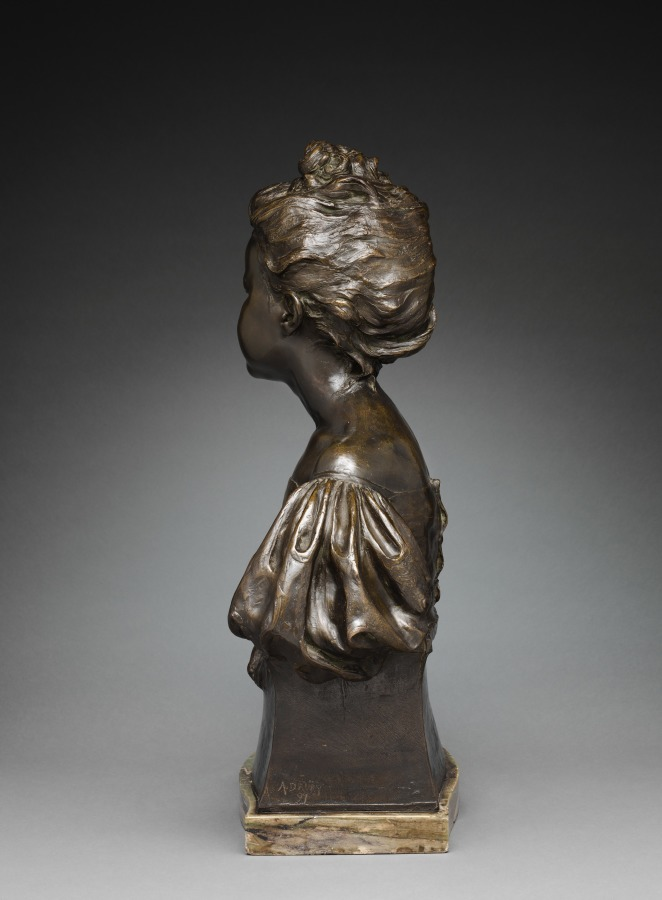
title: The Age of Innocence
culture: England, 19th century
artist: Alfred Drury (British, 1856–1944)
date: 1897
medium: bronze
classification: Sculpture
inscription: signed and dated: A. DRURY 97.